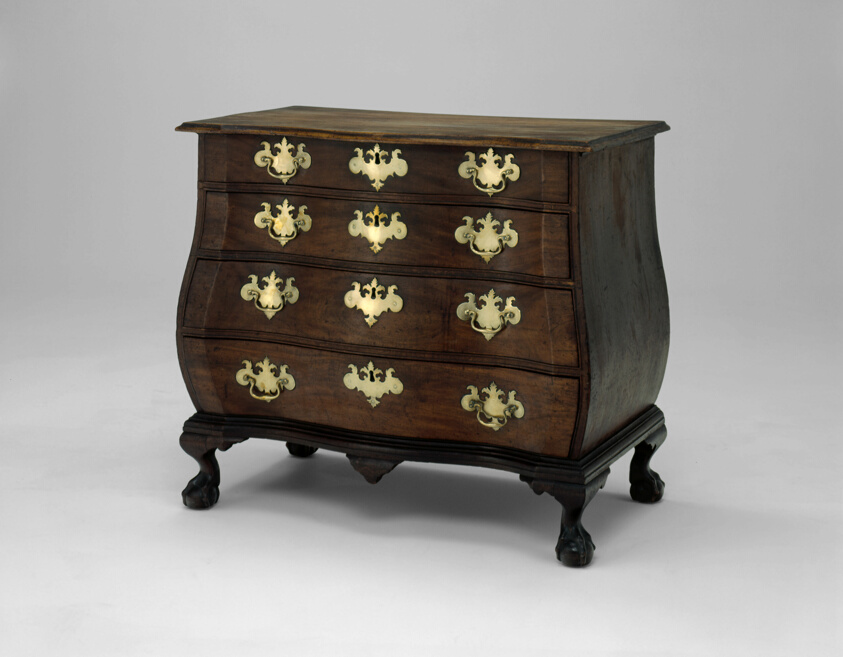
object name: Furniture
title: Chest of Drawers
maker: Attributed to John Cogswell; American, 1738–1819; Boston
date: 1760–90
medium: Mahogany with white pine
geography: Boston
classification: case furniture; furniture; american decorative arts; american arts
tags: furniture